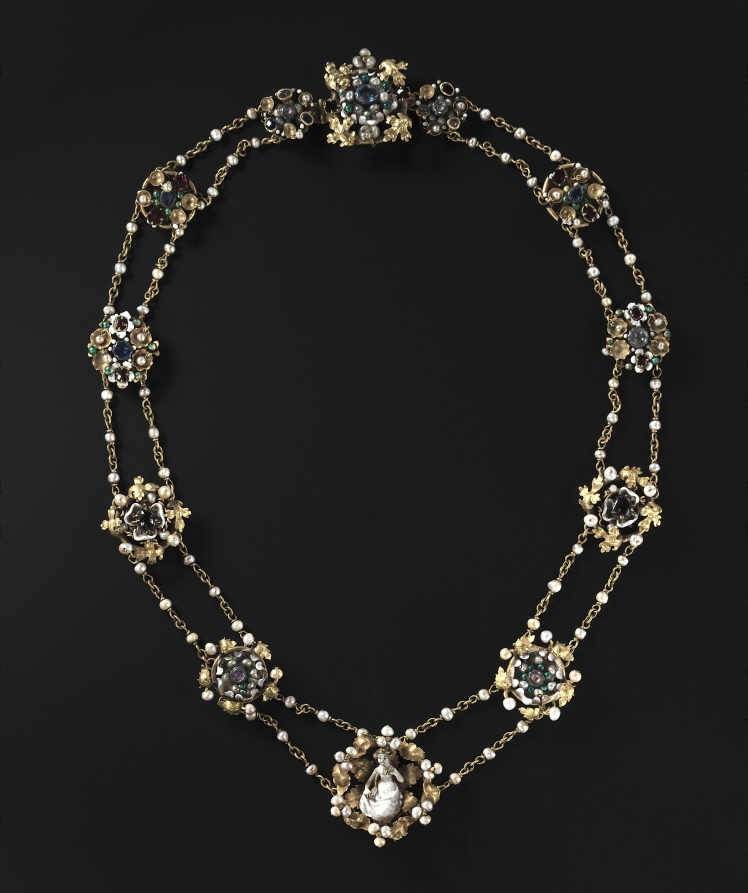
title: Twelve Medallions Mounted as a Necklace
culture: France, Paris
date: c. 1400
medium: enameled gold, precious stones, and pearls; some later additions with modern chain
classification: Jewelry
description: These medallions, which have loops on the backs, must have originally been sewn onto a garment or, more likely, a woman’s headpiece. In spite of the modern chain to which they are now attached, the medallions are unique items of feminine apparel from around 1400. Such items would have been well known at the courts of the Valois in Paris, Bourges, and Dijon. The central medallion with a “white lady” is enameled “in the round”––a new Parisian technique for enameling irregular or three-dimensional surfaces. Such white lady medallions are described in inventories of the period